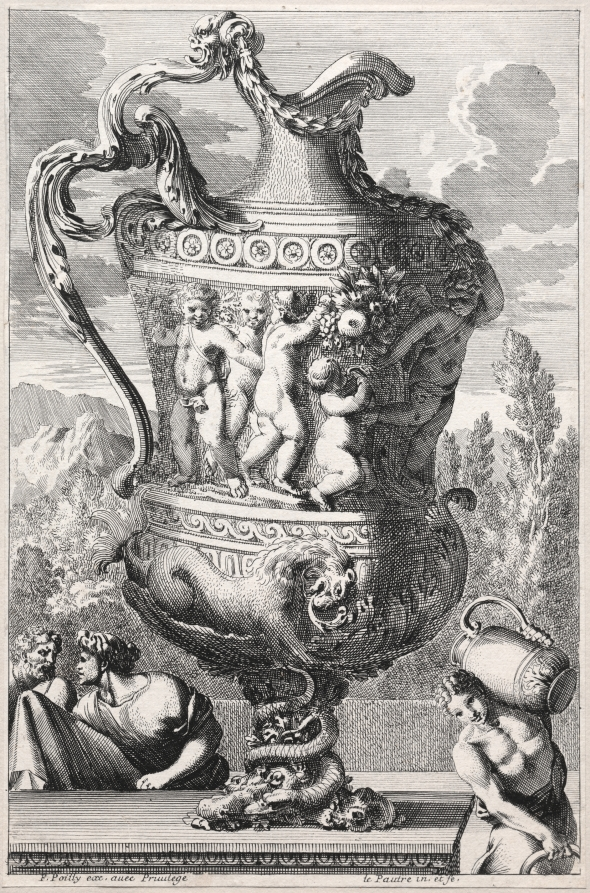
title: Decorative Urn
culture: France, 17th century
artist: Jean Le Pautre (French, 1618–1682)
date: 1600s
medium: etching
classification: Print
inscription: inscribed, lower left, in plate: F. Poilly exc. avec Privilege; inscribed, lower right, in plate: le Pautre in. et fe.